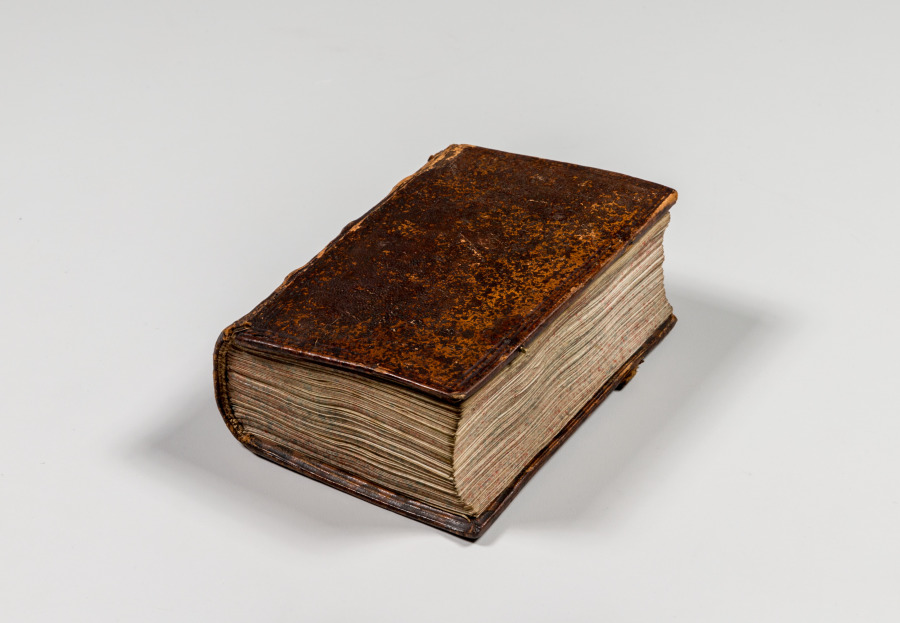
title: Book of Hours (Use of Metz)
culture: France, Metz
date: c. 1440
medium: ink, tempera, and gold on vellum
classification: Bound Volume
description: The first seven folios of this book list dedications for Metz churches and indulgences, or ways to receive forgiveness for sins, that are unique to that diocese, or area of jurisdiction of a bishop. The city of Metz, situated on the Moselle River, was the cultural and commercial capital of Lorraine during the 1400s. It was also the location of an important bishopric and therefore the center of a growing book trade.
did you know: It is believed that medieval men and women read their books of hours aloud, not silently.